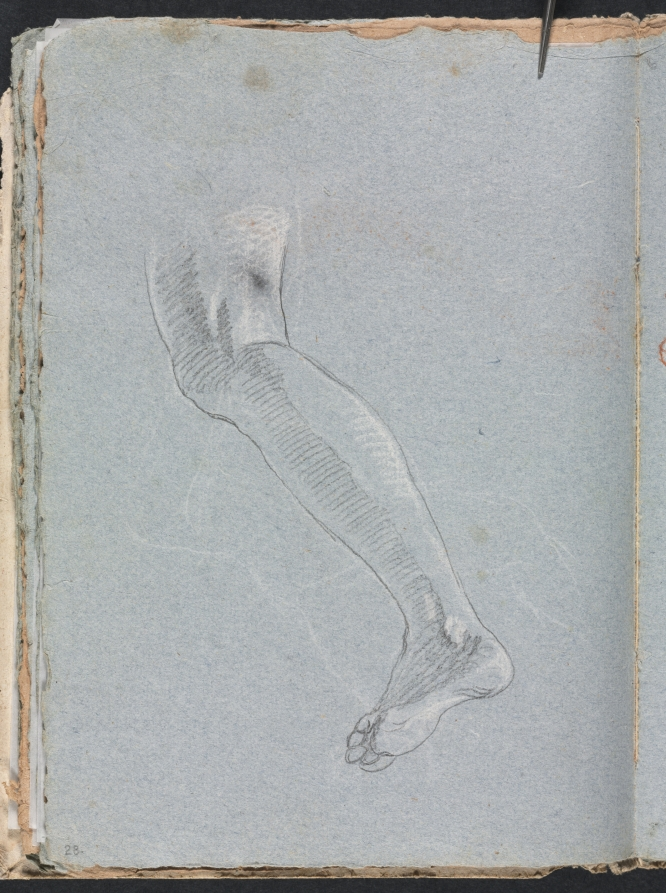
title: Verona Sketchbook: Left leg (page 28)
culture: Italy, 18th century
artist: Francesco Lorenzi (Italian, 1723–1787)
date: 1760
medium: black chalk with white heightening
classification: Bound Volume